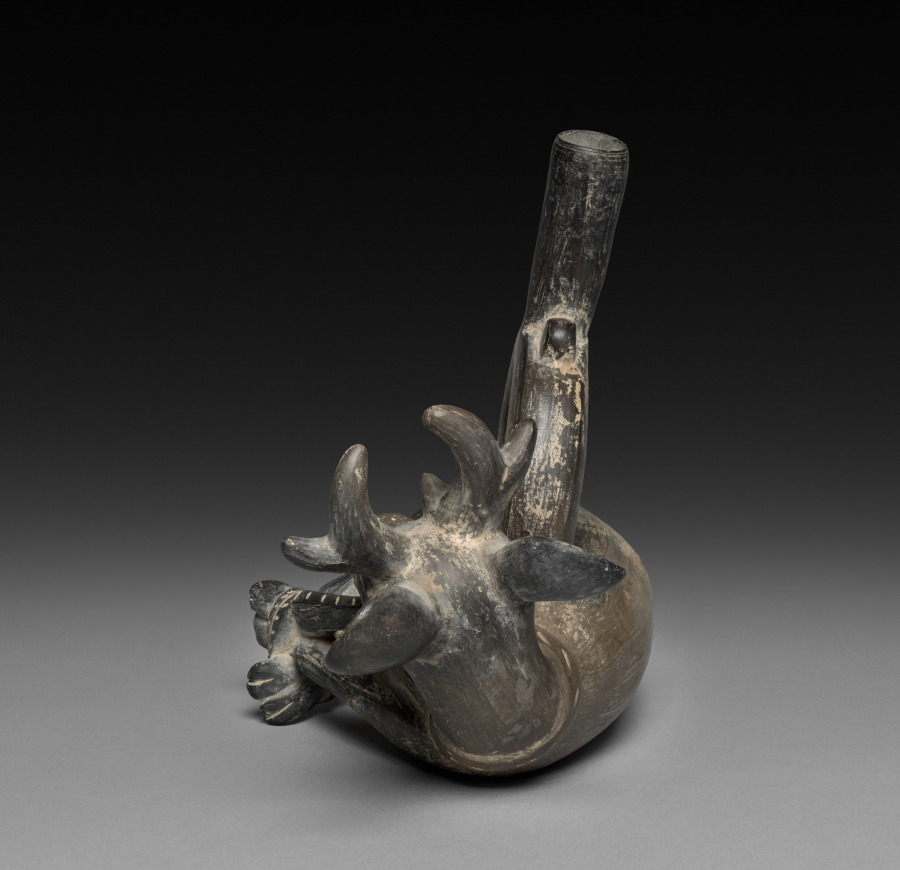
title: Bound Deer Effigy Vessel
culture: Andes, North Coast, Chimú people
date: 1000–1460s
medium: Ceramic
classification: Ceramic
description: This vessel was made by an artist of the Chimú Empire of Peru’s north coast. In the art of the Moche, an earlier culture in the region, the deer had complex symbolism related to ritual combat and the capture of prisoners. A memory of that symbolism may survive here in the binding of the deer’s feet.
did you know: Chimú potters fired their vessels in an atmosphere of reduced oxygen to achieve a uniform black surface.